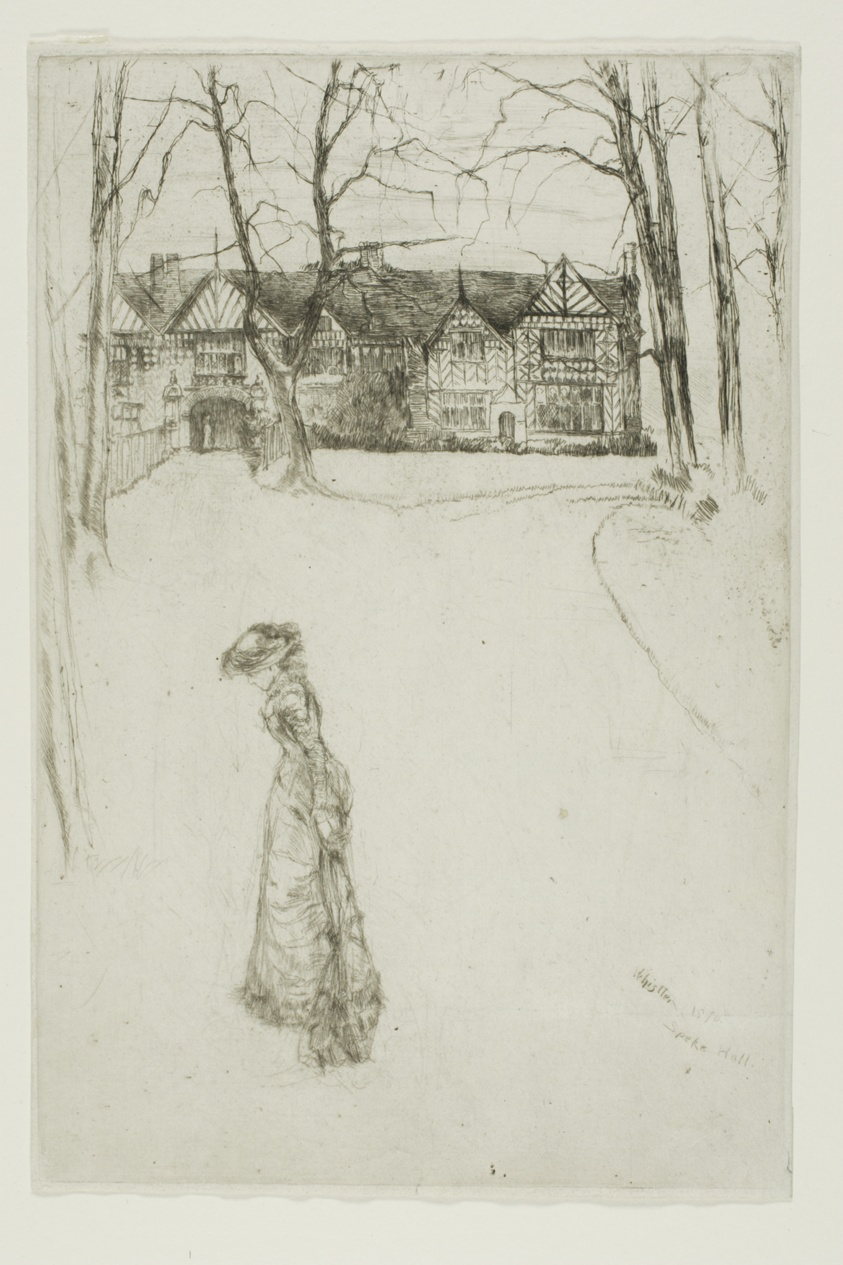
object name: Print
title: Speke Hall: The Avenue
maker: James McNeill Whistler (American, 1834-1903)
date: 1870–1878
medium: Etching and drypoint with foul biting in black ink on off-white laid paper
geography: United States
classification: etching; foul biting; drypoint; print; prints and drawing; paper